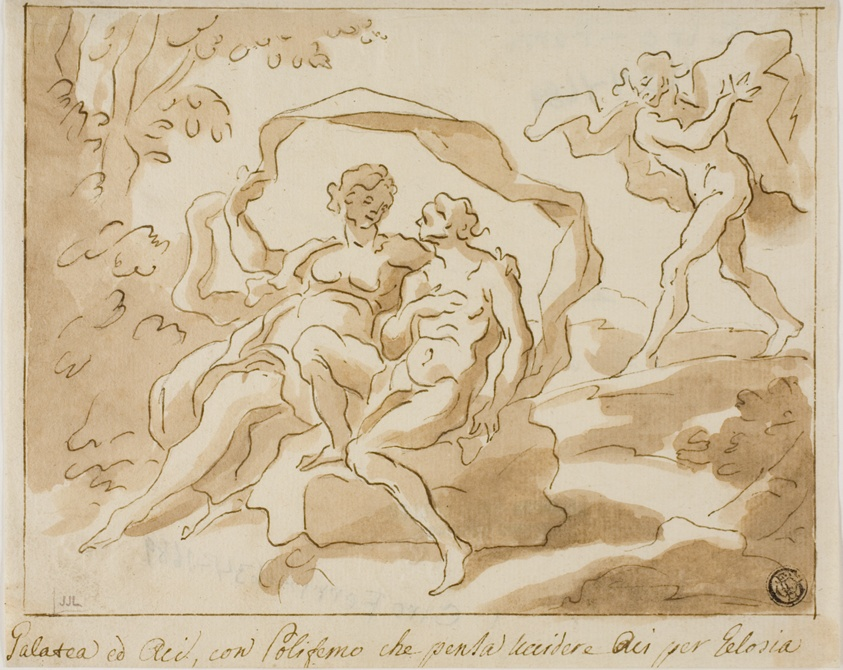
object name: Drawing and Watercolor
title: Galatea and Acis with Polyphemus who is about to kill Acis out of Jealousy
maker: Style of Giovanni Antonio Pellegrini (Italian, 1675-1741); or Ciro Ferri (Italian, 1634-1689); or Francesco Solimena (Italian, 1657-1747)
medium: Pen and brown ink, with brush and brown wash, over traces of black chalk, on ivory laid paper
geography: Italy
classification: ink or chalk wash; drawings (visual works); prints and drawing